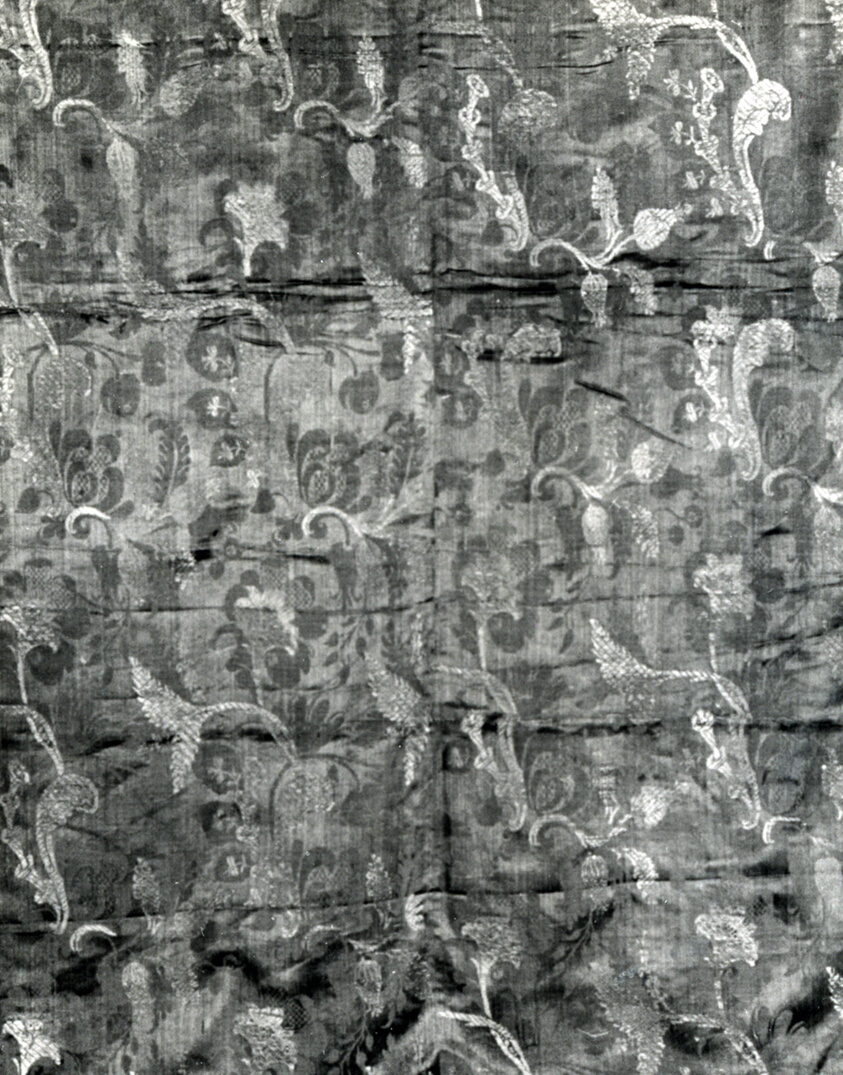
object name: Textile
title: Panel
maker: France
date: 1700/25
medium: Blue damask silk brocaded with tan, light rose, green, and silver with wool on reverse.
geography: France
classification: textile; weaving